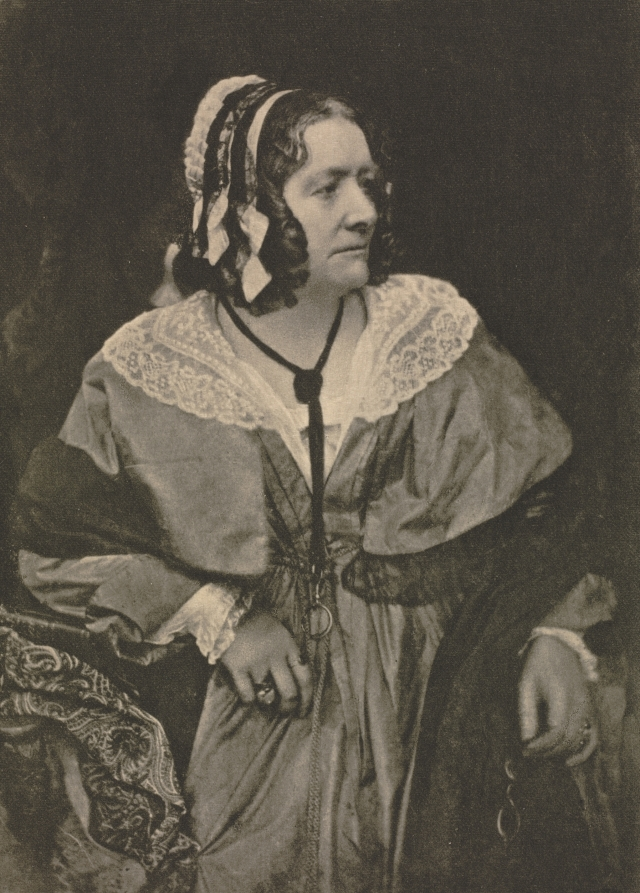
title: Camera Work: Mrs. Anna Brownell Jameson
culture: England, 20th century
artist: David Octavius Hill (British, 1802–1870)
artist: and Robert Adamson (British, 1821–1848)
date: 1912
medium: photogravure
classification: Bound Volume